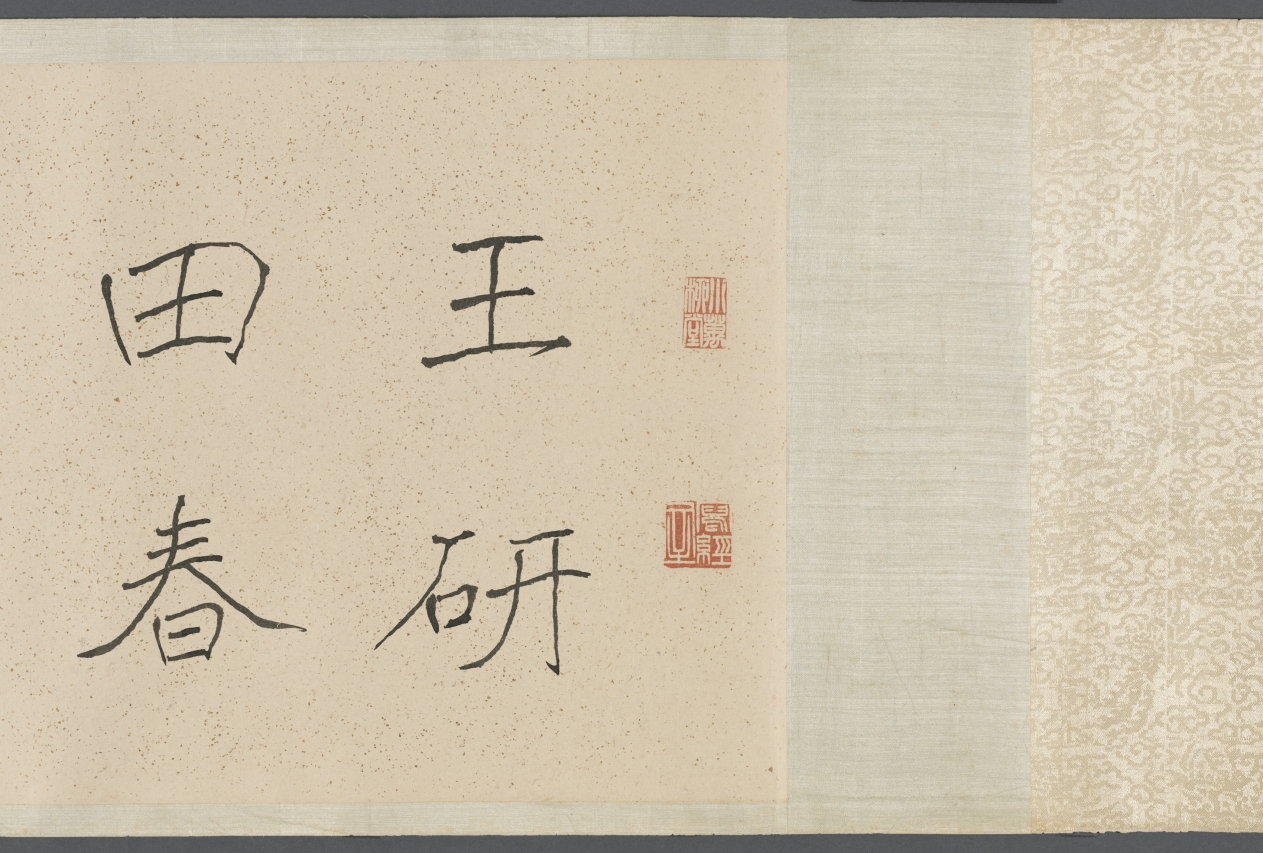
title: Spring Rain Thatched Hut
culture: China, Qing dynasty (1644-1911)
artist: Wang Jianzhang (Chinese, active 1621–1662)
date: 1650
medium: handscroll, ink on paper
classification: Drawing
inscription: Title by Wu Zhiying 吳芝瑛 (1868–1933), dated 1910.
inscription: 春雨草堂圖。庚寅仲春，為紫玄社兄畫於若耶溪上。 仲初王建章。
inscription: 12 colophons by Gong Weiliu’s 宮偉鏐 (1611–1680) contemporaries: Fang Gongqian 方拱乾 (1596–1667, jinshi of 1628); Jiang Cai 姜埰 (1607–1673); Liang Yizhang 梁以樟 (1608–1665); Du Shaokai 杜紹凱 (also named Du Jie 杜岕, 1617–after 1689), dated 1648; Zhao Kaixin 趙開心 (d. 1663), dated 1647; Zhao Erbian 趙而忭 (d. 1658); Yu Yaoguang 余耀光, dated 1649; Yao Quan 姚佺, dated 1648; Chen Taisun 陳台孫 (b. 1611, jinshi of 1640); (Monk) Shao 韶; Du Zhujin 杜祝進; and Tang Shi 唐時.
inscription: 此研田莊居士王建章為先太史紫元公所作春雨草堂圖也。居士字仲初，明崇禎間人，與先太史及惲香山相友善。喜畫佛像，自謂不讓李公麟。山水祖述董源，筆力雄健，有不可羈勒之概。香山稱其墨有五采，非世人所知。然性廉重，非同志不輕落筆，人得其寸圖尺縑，必相與忻賞，如獲蜼彝兕敦，非人世間物也！見先太史筆記，此圖寫雨景，而氣韻生動，勃勃於不能止。每一展覽，覺滿紙雲烟，墨瀋猶濕，如寫吾先人胸中未盡之邱壑也。圖後題詠，多一時名手，想見文采風流之盛。迄今二百餘年，舊德先疇，遺風未沫。吾子孫其永寶之，如與吾先人接謦咳於一堂，為感思之助，其敢作圖畫觀乎！同時香山亦有圖佚去己久，不知異日能為延津之合否。壬申長夏本昂重裝敬識。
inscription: Collectors' seals including: Gong Ben'ang 宮本昂 (1821–1874); Lian Qian 廉泉 (1868–1932); Wu Zhiying 吳芝瑛 (1868–1933)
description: With its striking simplicity, this painting captures the pure serenity of a private garden in the moist atmosphere of a spring morning on a small river. Painted in the style of Ni Zan, Wang Jianzhang dedicated this work to his patron-friend Gong Weiliu (1611-1680). Gong retired from government service after the fall of the Ming dynasty and constructed a garden-retreat at his native home in Taizhou, Jiangsu province. He invited scholars and poets from his literary society to contribute writings of his estate, which are here mounted together with the painting in this scroll.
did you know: Gong Weiliu, the owner of the estate portrayed here, had received his prestigious jinshi degree in 1643, but his official career was thwarted by the collapse of the Ming dynasty the following year.